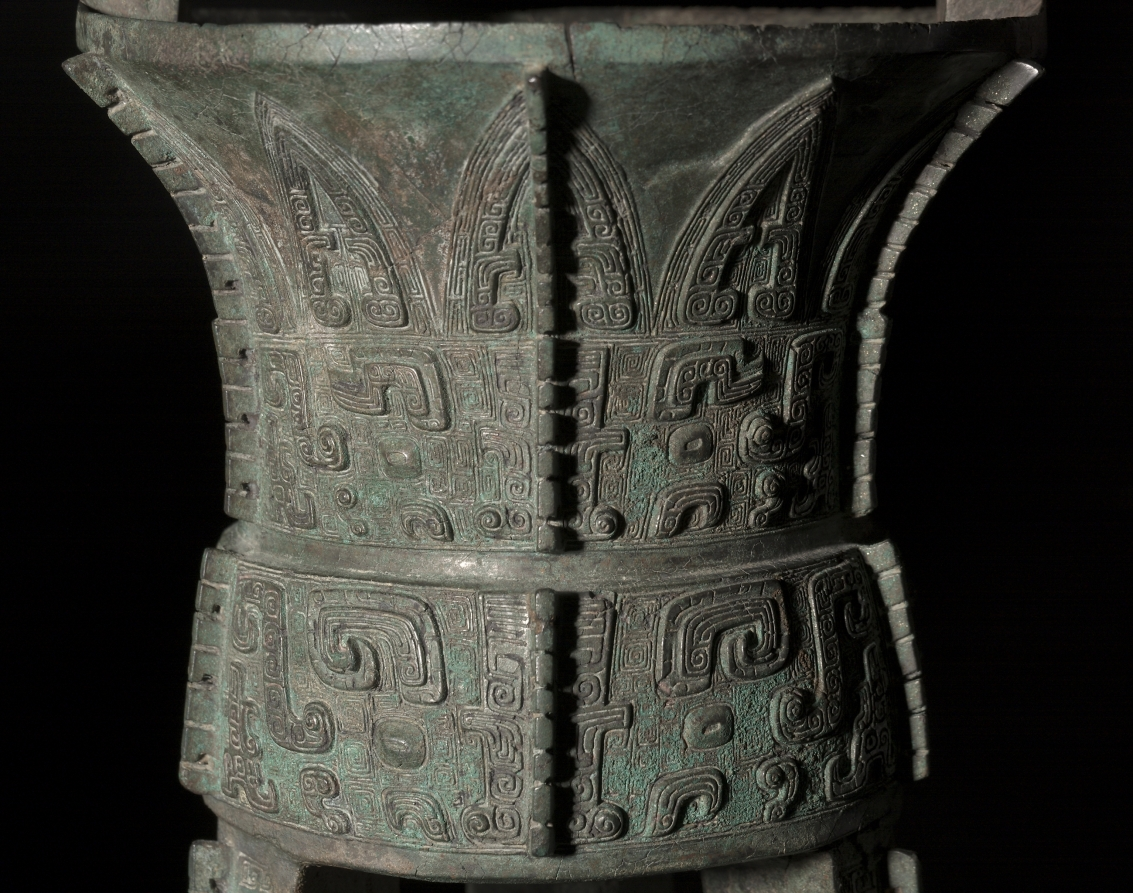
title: Wine Vessel (Jia)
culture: China, Shang dynasty (c. 1600–c. 1046 BCE), Anyang phase (c. 1250–1046 BCE)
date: c. 1250–1046 BCE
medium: bronze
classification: Metalwork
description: This large wine vessel (or jia) is among those very rare, monumental pieces uncovered from Anyang, the last royal capital of the Shang dynasty (c.1700–c.1100 BCE). Probably very few monumental bronze vessels were ever made; each of them must have cost a fortune and was used to designate high-ranking (often royal) status. Even fewer have survived. This wine vessel was used for the ancestral rites of the Shang. Its three splayed legs supported the cup over a fire, suggesting that the wine might be heated. Offering wine and food to their departed ancestors was an essential ritual practice performed by the Shang royalty and aristocracy. The Shang people believed that their ancestors were able to intercede with the high god to confer fruitful harvests and victories in battles. Their ritual actions involved communication with the supernatural realm (and this was further supported by the practice of divination with the use of a tortoise shell or a cattle shoulder blade). Here, the animal mask on the bronze vessel stares frontally at the viewer and serves symbolically as a messenger of communication with the ancestors. It conjures up the potency of mystery, whereas the static monumentality of the bronze vessel lends an air of dignified solemnity to the ritual ceremony.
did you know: Ancient bronze vessels are ritual and religious in nature, linked inextricably to political legitimization, and are source materials for Chinese historiography and traditional antiquarianism.